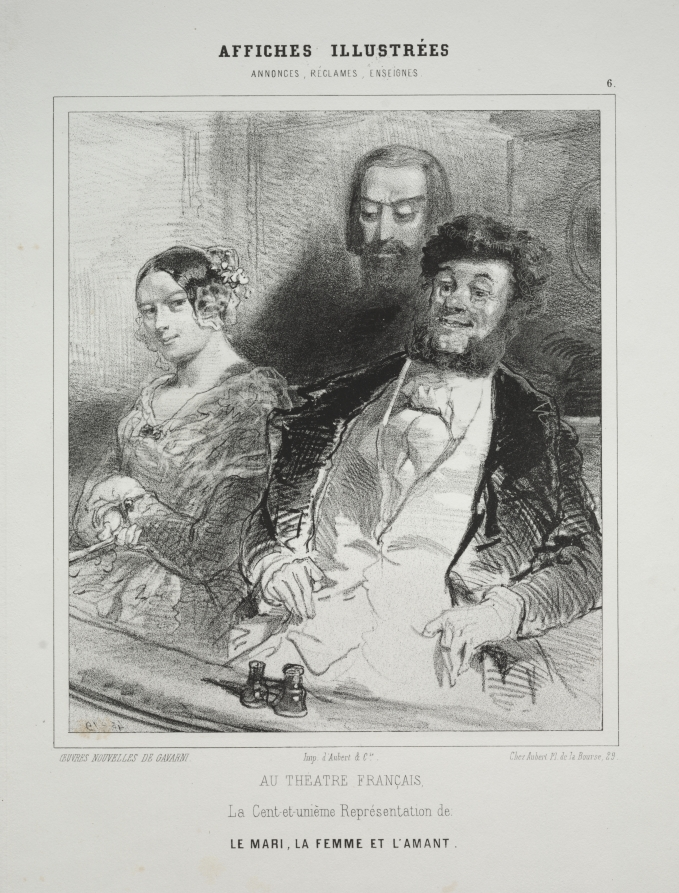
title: Affiches Illustées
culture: France, 19th century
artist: Paul Gavarni (French, 1804–1866)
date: c. 1844–46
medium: lithograph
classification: Print